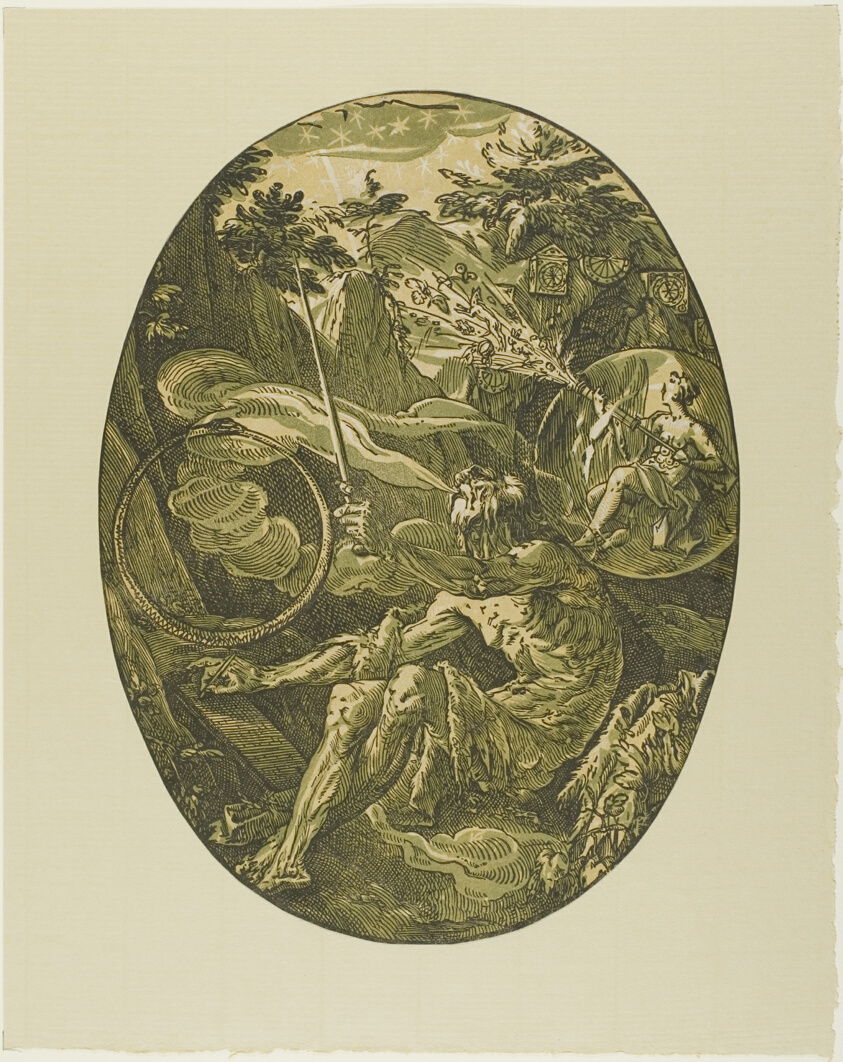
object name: Print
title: Demogorgon in the Cave of Eternity, plate one from Demogorgon and the Deities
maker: Hendrick Goltzius; Dutch, 1558-1617; second edition printing by Willem Jansz. Blaeu; Amsterdam, 1605-1620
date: c. 1588–90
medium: Chiaroscuro woodcut in black, green, and buff on paper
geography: Netherlands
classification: woodcut; print; prints and drawing